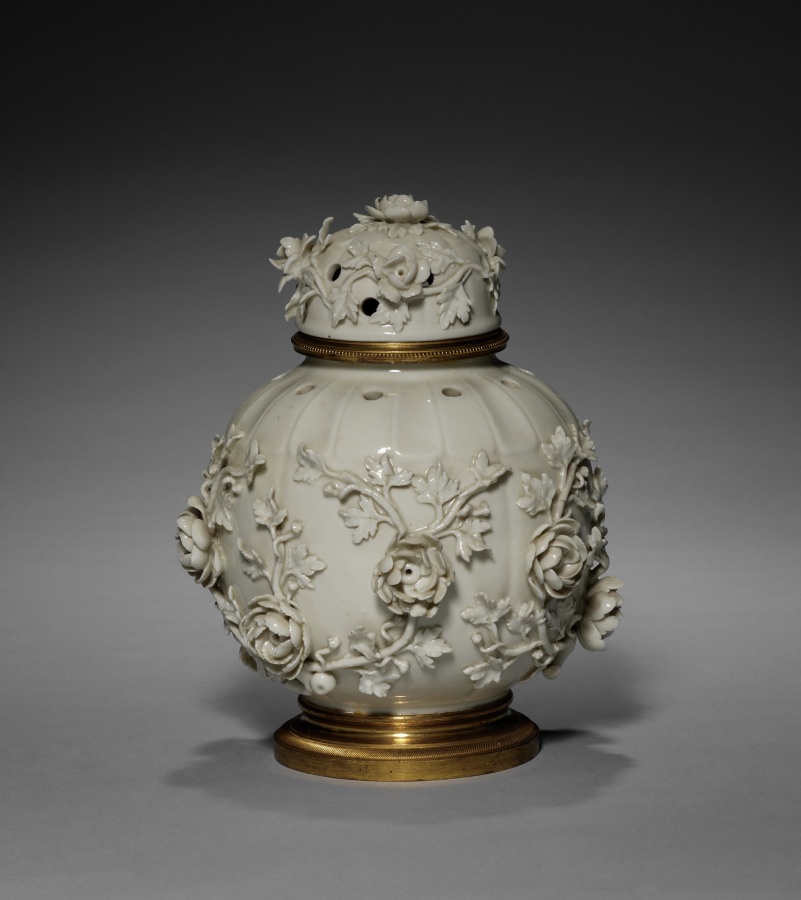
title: Potpourri Vase with Cover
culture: France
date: c. 1860–80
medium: blanc-de-chine porcelain; gilt bronze mount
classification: Ceramic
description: This vase was likely made by the celebrated Parisian ceramics firm of Edmé Samson (1810-91). To cater to the resurgence in taste for 18th-century designs, the Samson firm specialized in making reproductions of rare 18th-century European porcelains, especially those from firms that had already copied Chinese porcelains. In this case, this vase's design is taken from models produced by the St. Cloud factory in the 1750s after earlier Qing dynasty Chinese ceramics. However, the telltale sign that this vase is made by Samson and not St. Cloud is that the original would have been made from a soft-paste porcelain (fired at a lower temperature), while this example is made of hard-paste porcelain (fired at the highest temperature).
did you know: Potpourri vases always have holes in the top to let the scent of dried spices and flowers contained within freshen the air around them.